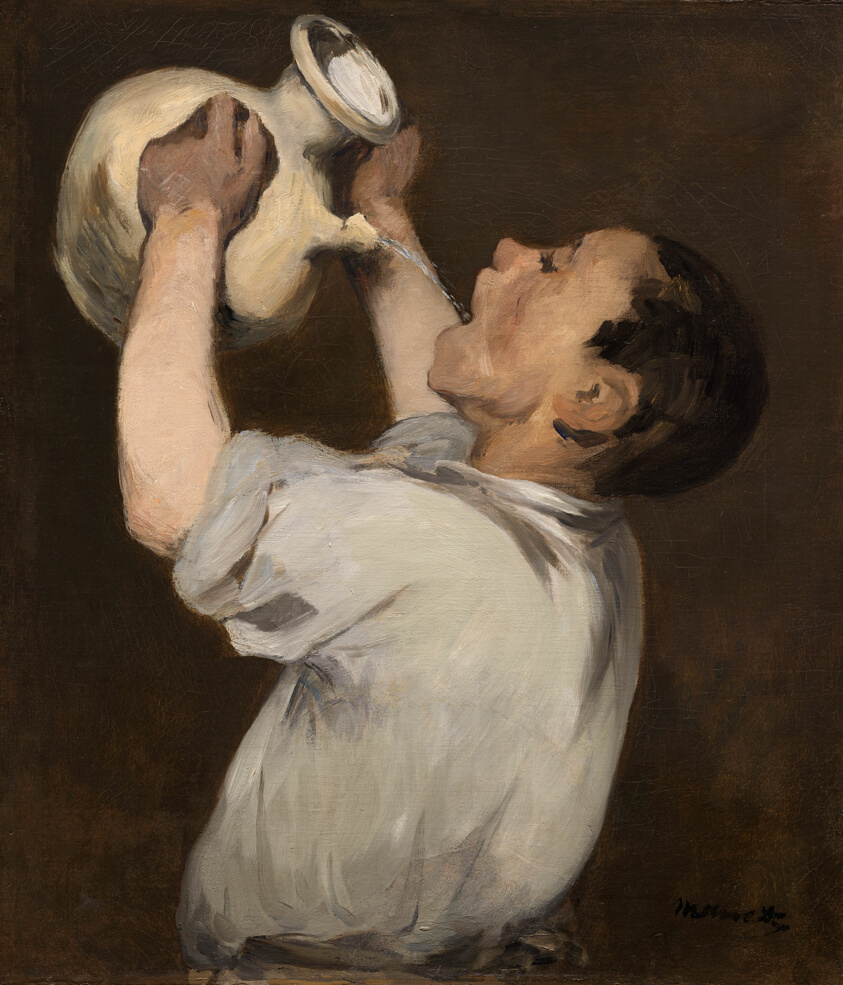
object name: Painting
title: Boy with Pitcher (La Régalade)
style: Impressionism, 19th century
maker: Édouard Manet (French, 1832-1883)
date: 1862–72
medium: Oil on canvas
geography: France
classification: oil on canvas; painting; french; paint; european painting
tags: portraits, pitcher, children, water